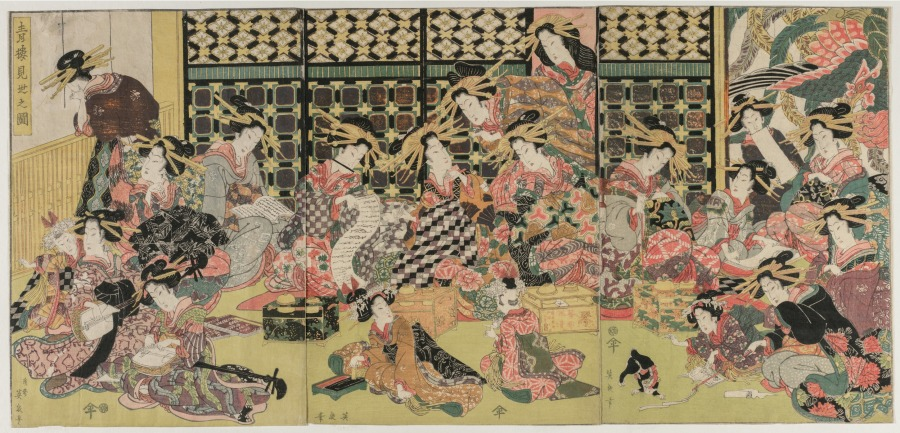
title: A Picture of the Viewing in the Pleasure Quarters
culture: Japan, Edo period (1615–1868)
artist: Kikukawa Eizan (Japanese, 1787–1867)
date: 1810s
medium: color woodblock print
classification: Print